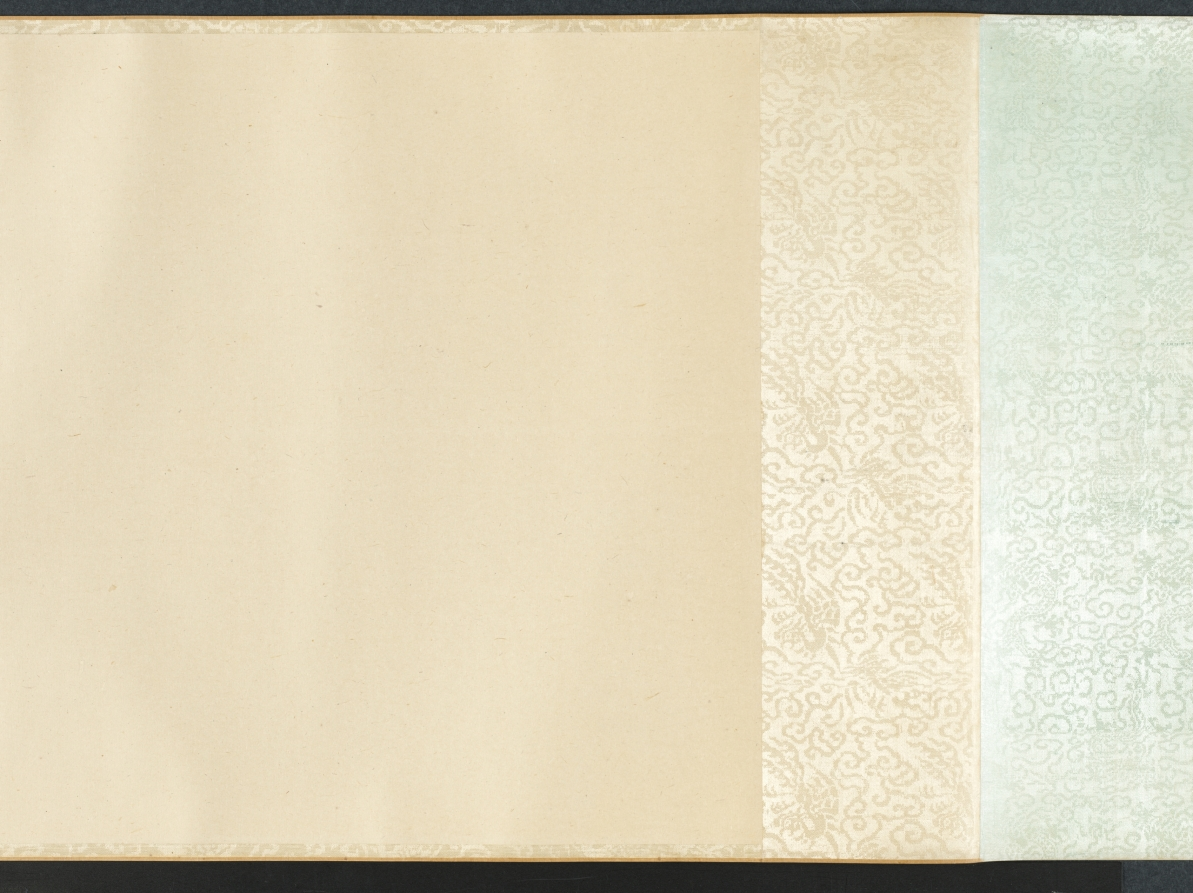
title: Cloudy Mountains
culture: China, Southern Song dynasty (1127-1279)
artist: Mi Youren (Chinese, 1072–1151)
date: 1130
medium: Handscroll; ink and color on silk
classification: Painting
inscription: 好山無數接天涯，烟靄陰晴日夕佳。/ 要識先生會到此，故留筆戲在君家。/ 庚戍歲，辟地新昌作。元暉。/ [seal] 元暉戲作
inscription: [Seal] 安陽孫氏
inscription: [Seal] 畢瀧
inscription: [Seal] 成親王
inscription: [Seal] 永瑆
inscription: [Seal] 錫三 appears twice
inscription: [Seal] 養性齋珍藏書畫印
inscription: [Seal] 芷陔審定真跡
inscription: [Seal] 玉簡齋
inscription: 2 colophons (1 dated 1650), inscription dated 1647, and 2 seals of Wang To (1592–1652)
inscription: 1 colophon, dated second month of the gengyin year 庚寅 (1650), and 2 seals of Chen Kuang 陳爌 (1646 jinshi degree)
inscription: 7 seals unidentified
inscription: A separate scroll containing six colophons on Cloudy Mountains exists; the inscribers are Luo Zhenyu 羅振玉 (1866–1940), Naito Torajiro 內藤虎次郎 (1866–1934), Nagao Ko 長尾甲 (1864–1942), and Wu Changshuo 吳昌碩 (1844–1927). Naito Torajiro alone wrote three colophons.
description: Cloudy Mountains captures the view of a lush and misty riverscape, an impression of Mi Youren’s new environment, painted in a moment of peace. With the fall of the Northern Song dynasty in 1127 upon the Jurchen’s military invasion, Mi Youren fled south across the Yangzi River. In 1130, he had reached Xinchang in Zhejiang province and thanked his host with this painting for having given him shelter. Mi Youren was the oldest son of the art critic Mi Fu (1051– 1107); both developed a distinct style of mountain scenery by accumulating wet ink dots that create a hazy atmosphere.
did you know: This scroll is one of the museum’s earliest dated Chinese paintings.